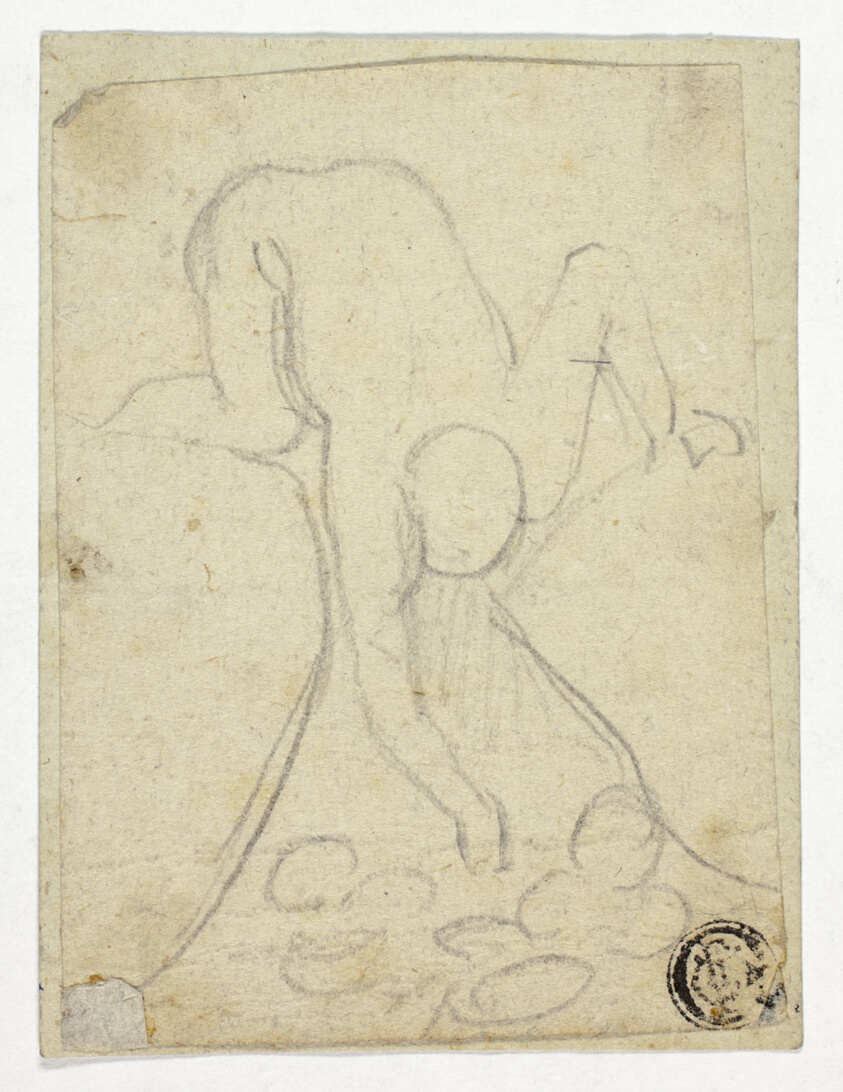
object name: Drawing and Watercolor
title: Nude Figure Reaching Down Between Rocks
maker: Attributed to William Blake (English, 1757-1827); or a follower of William Blake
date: c. 1800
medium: Graphite on cream laid paper, tipped onto cream laid paper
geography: England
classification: graphite; paper; drawings (visual works); prints and drawing